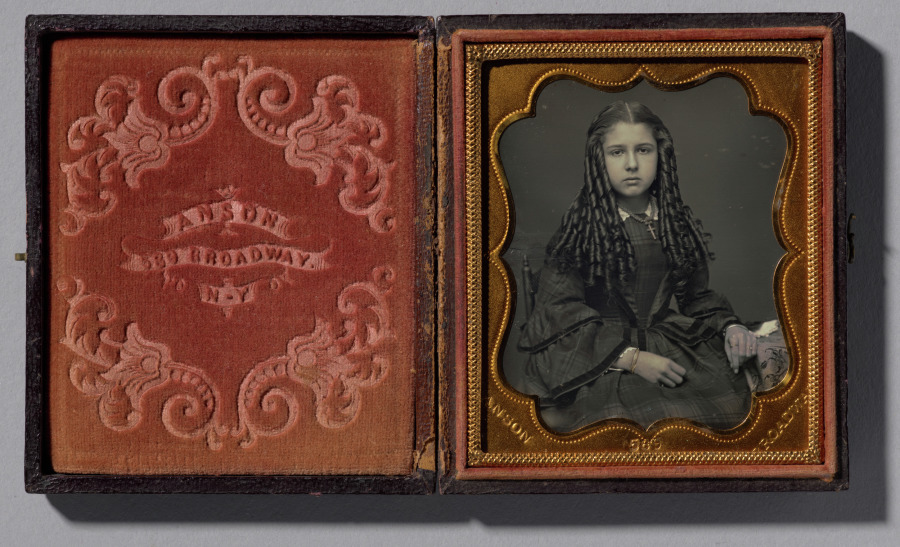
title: Teenage girl with bottle curls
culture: America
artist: Rufus Anson (American, 1820–1900)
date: c. 1855–60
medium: daguerreotype, sixth plate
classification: Photograph